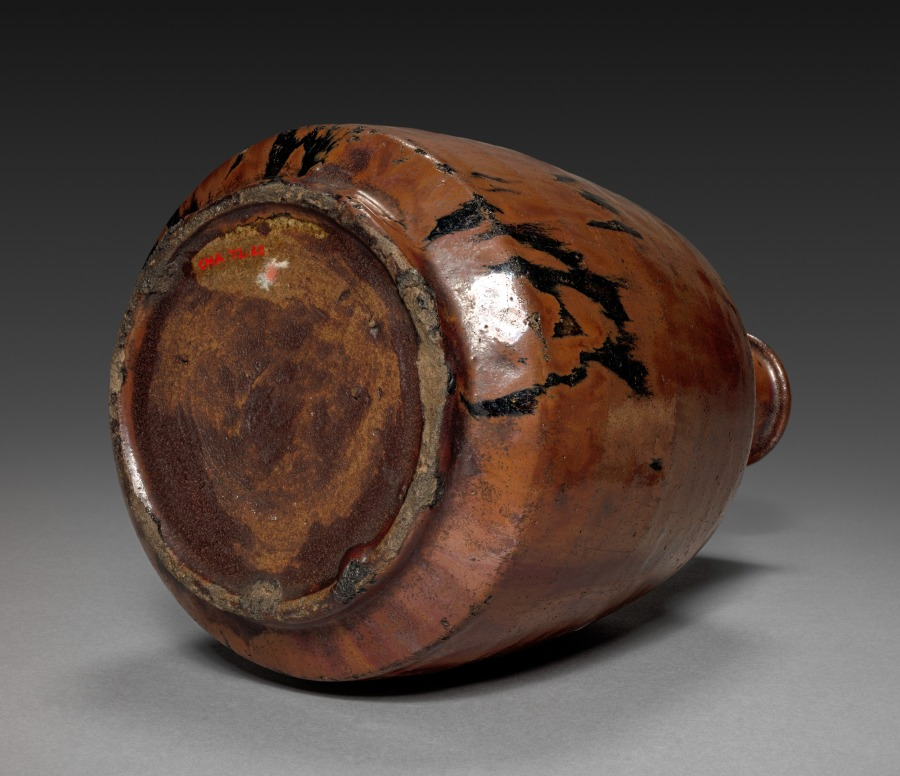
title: Bottle Vase: Seto Ware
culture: Japan, Momoyama period (1573-1615) to Edo period (1615-1858)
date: 1600–1650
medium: slip glazed stoneware (Mino or Seto ware)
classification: Ceramic